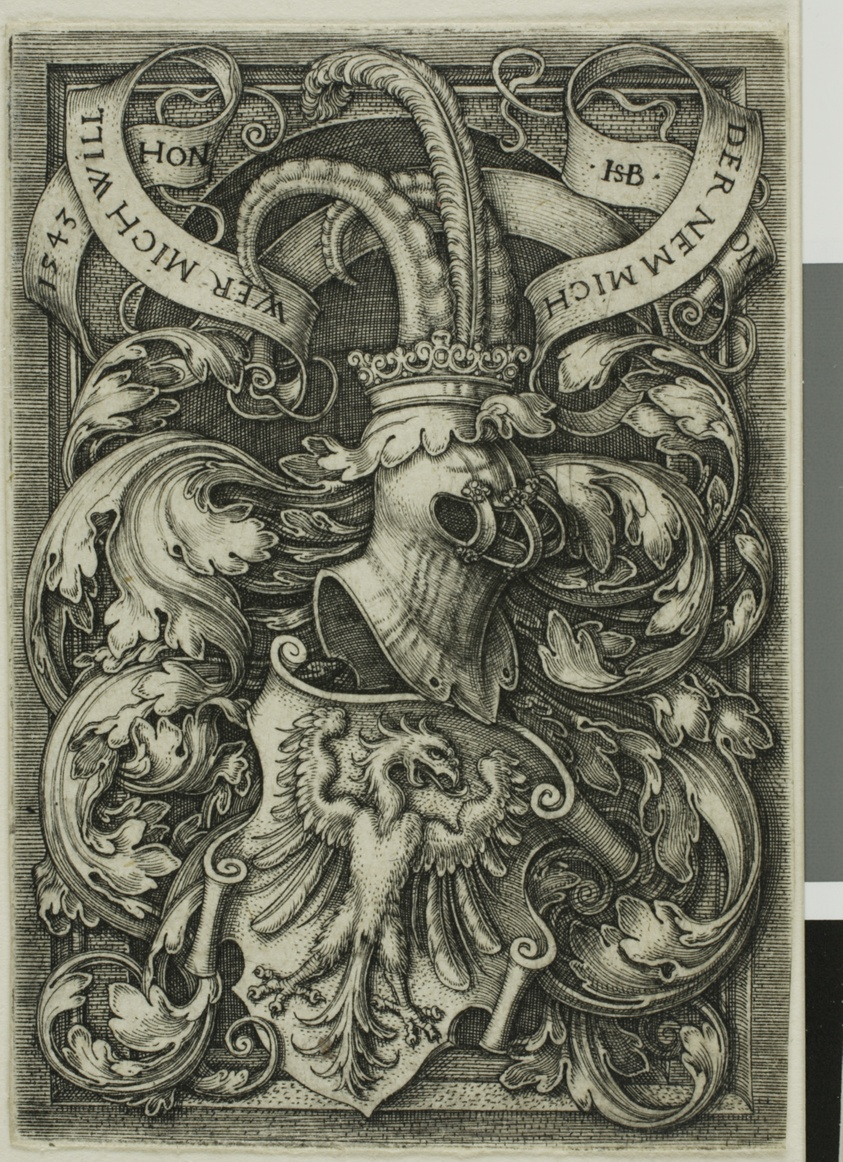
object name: Print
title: Coat of Arms with an Eagle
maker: Sebald Beham; German, 1500-1550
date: 1543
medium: Engraving in black on ivory laid paper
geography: Germany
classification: engraving; print; prints and drawing